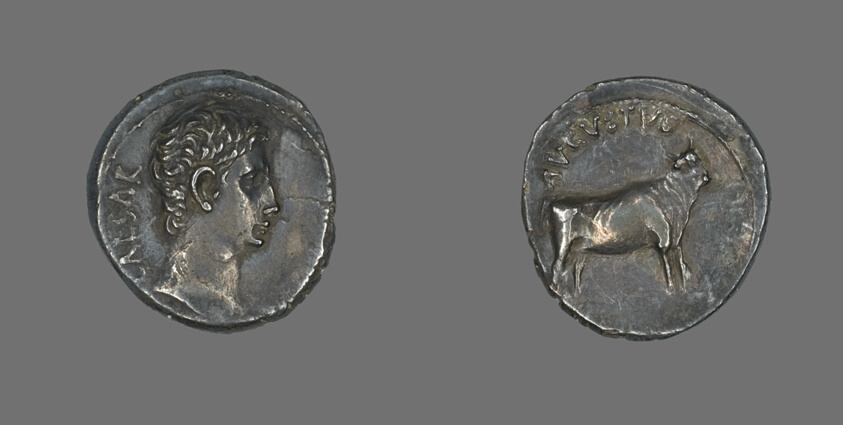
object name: Coin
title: Denarius (Coin) Portraying Emperor Augustus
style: imperial (roman)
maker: Roman; minted in Samos (or possibly Pergamum)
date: 21-20 BCE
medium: Silver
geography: Roman Empire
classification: coin; ancient art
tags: bull, cobras